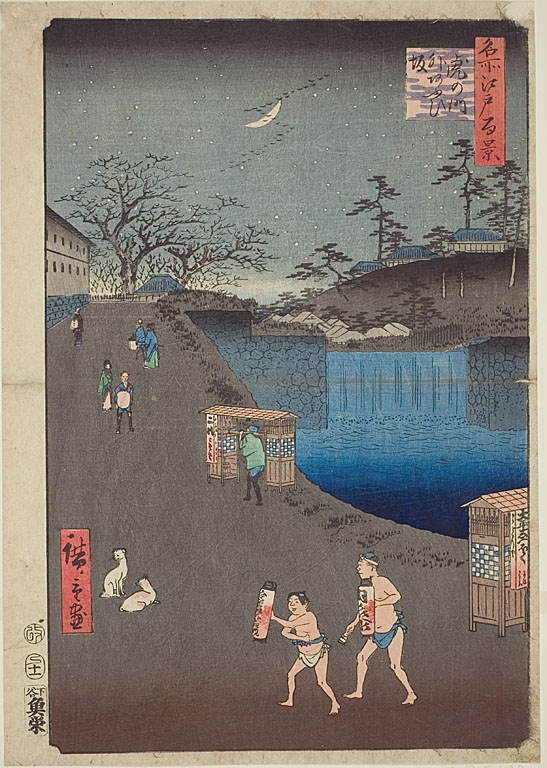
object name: Print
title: Aoi Slope, Outside Tora Gate (Toranomon-soto Aoizaka), No.113 from the series "One Hundred Famous Views of Edo (Meisho Edo hyakkei)"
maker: Utagawa Hiroshige (Japanese, 1797-1858)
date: 1857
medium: Color woodblock print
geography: Japan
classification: woodblock print; print; asian art